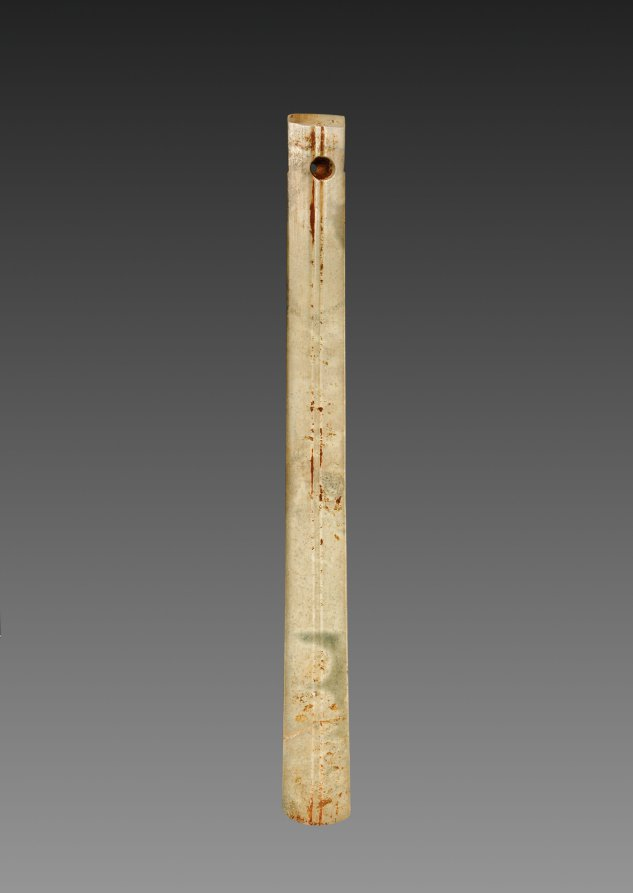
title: Ceremonial Scepter with Animal Masks (Gui)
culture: China, Shang dynasty (c. 1600–c. 1046 BCE)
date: c. 1600–1050 BCE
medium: jade (nephrite)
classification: Jade